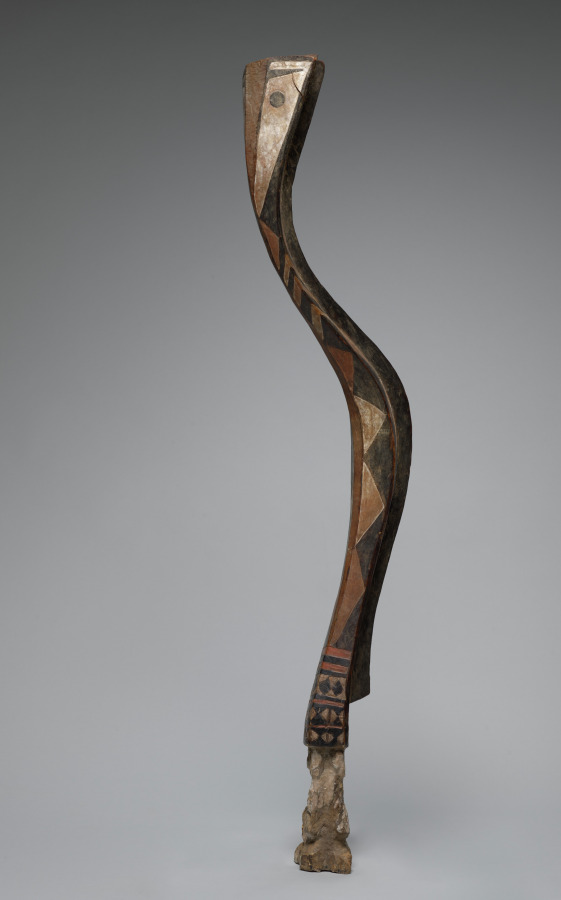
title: Serpent Headdress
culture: Africa, West Africa, Guinea, possibly Baga-style maker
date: late 1800s–early 1900s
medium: Wood (Nauclea pobeguinii) and paint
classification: Mask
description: Traditionally, Baga society was ruled by village councils of elders who derived their power from their direct contact with spirit entities through lifelong initiation rituals and the accumulation of secret knowledge. Two different religious orders controlled initiations, providing the context for much Baga art. One was identified as female, the other as male, though only men belonged to both groups. Initiations in each order followed three stages, culminating in the revelation of the highest spirit being. This type of Baga headdress embodied the serpent spirit Ninkinanka, honored for giving rain, bestowing riches, and bringing forth children. The serpent figure would be placed on top of a conical framework of palm branches carried on a male dancer’s head. It appeared at the end of the first level of the initiation for boys and girls or just before the circumcision at the beginning of the boys’ initiation.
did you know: In the context of boys' initiations, the serpent headdress was sometimes identified as the rainbow, which the Baga and their neighbors associate with beginnings and endings, life and death, and the continuation of lineages.